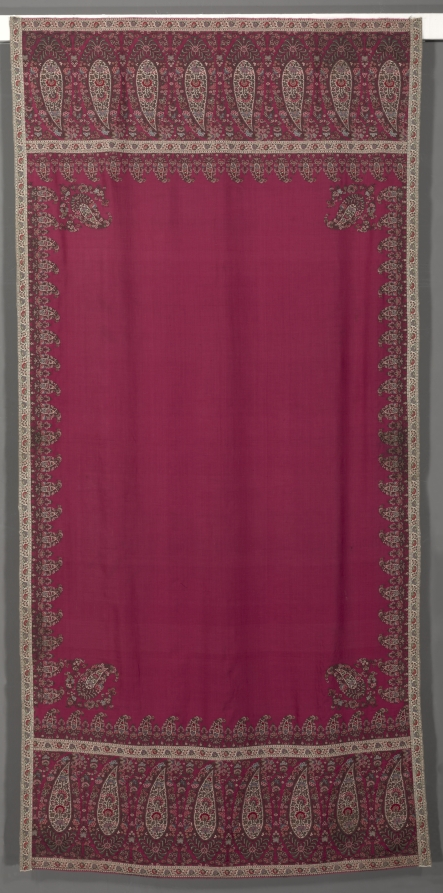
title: Long Shawl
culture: Europe (England, Scotland or France), 19th century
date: c. 1825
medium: 2/2 twill (S) weave ground with supplementary weft pattern in 3/1 (S) weave twill; silk; attached vertical border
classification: Textile